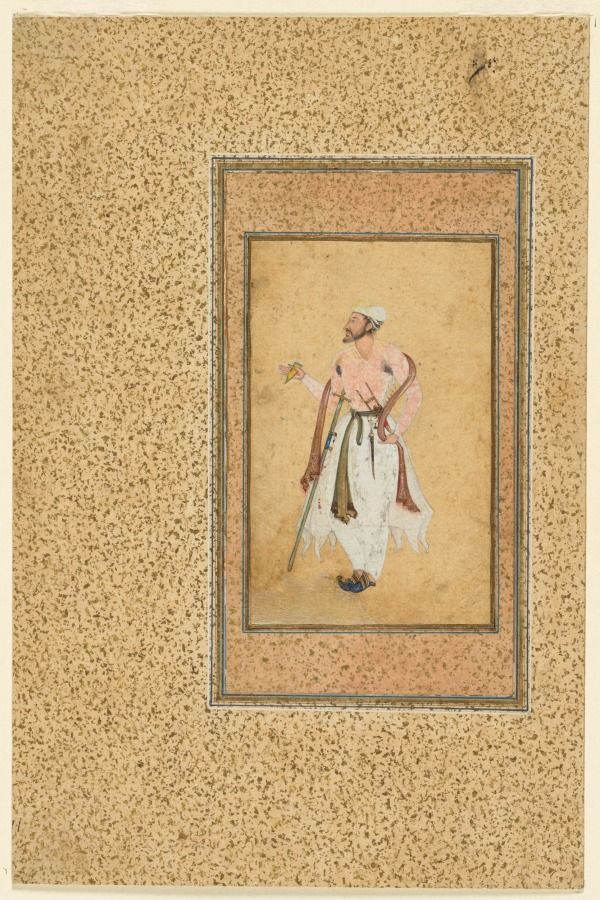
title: A Mughal courtier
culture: Mughal India, court of Akbar (reigned 1556–1605)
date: c. 1575; border added probably 1700s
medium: Gum tempera and gold on paper, mounted with gold-sprinkled borders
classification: Painting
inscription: Inscription in top margin, upside-down in nasta‘liq script, probably added c. 1700s: Sarkhod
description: This sensitive portrait is among the earliest surviving individual portraits from the Mughal atelier. He remains unidentified by inscription, since such portraits were made for the emperor Akbar who was unable to read. Realism in portraiture developed under Akbar as a means of keeping records of gifts and promotions without written notations. The figure conspicuously grasps the maroon and gold scarf in his left hand, which suggests that it may have been the gift from the emperor that would have occasioned the portrait. The array of blades he carries indicates that he was conscripted into military service at the Mughal court.